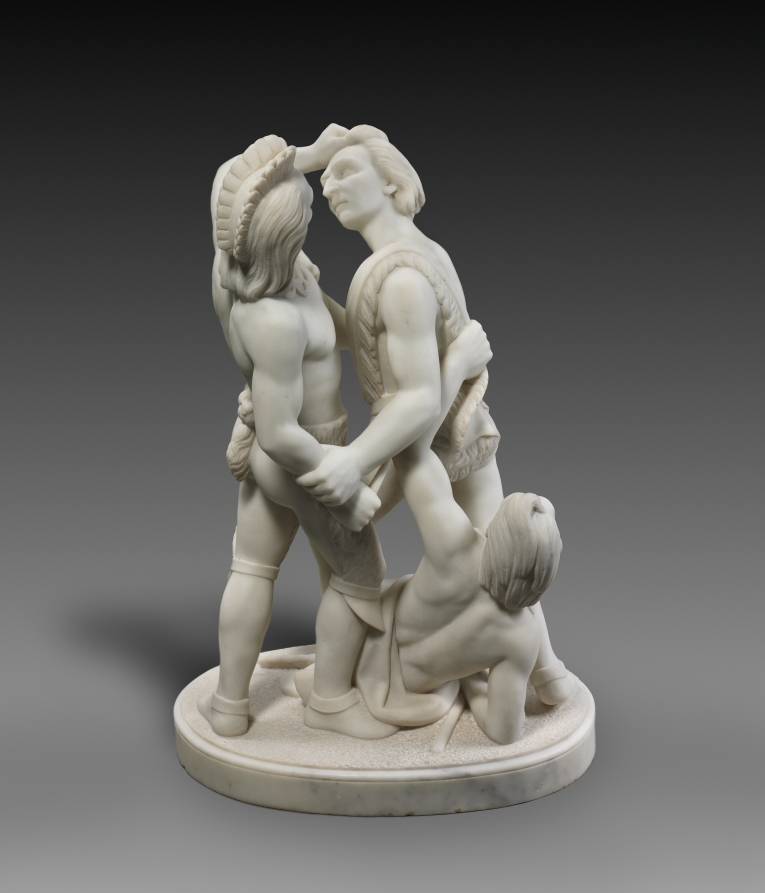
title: Indian Combat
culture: America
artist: Edmonia Lewis (American, c. 1844–1907)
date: 1868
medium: marble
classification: Sculpture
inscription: The base of the sculpture is inscribed: "EDMONIA LEWIS / FECIT A ROME 1868"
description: A spiraling composition with three intertwined figures, Indian Combat ranks as Edmonia Lewis’s most dynamic and complex creation. Although her Native American subjects typically exist in multiple versions, this example appears to be unique. Of Indigenous (Ojibwe) and African American ancestry, Edmonia Lewis studied at Oberlin College and apprenticed with a sculptor in Boston before moving to Rome in 1866. Her sculptures were readily purchased by patrons on both sides of the Atlantic.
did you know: Growing up in her Ojibwe community, Lewis went by a name that translates as "Wildfire."